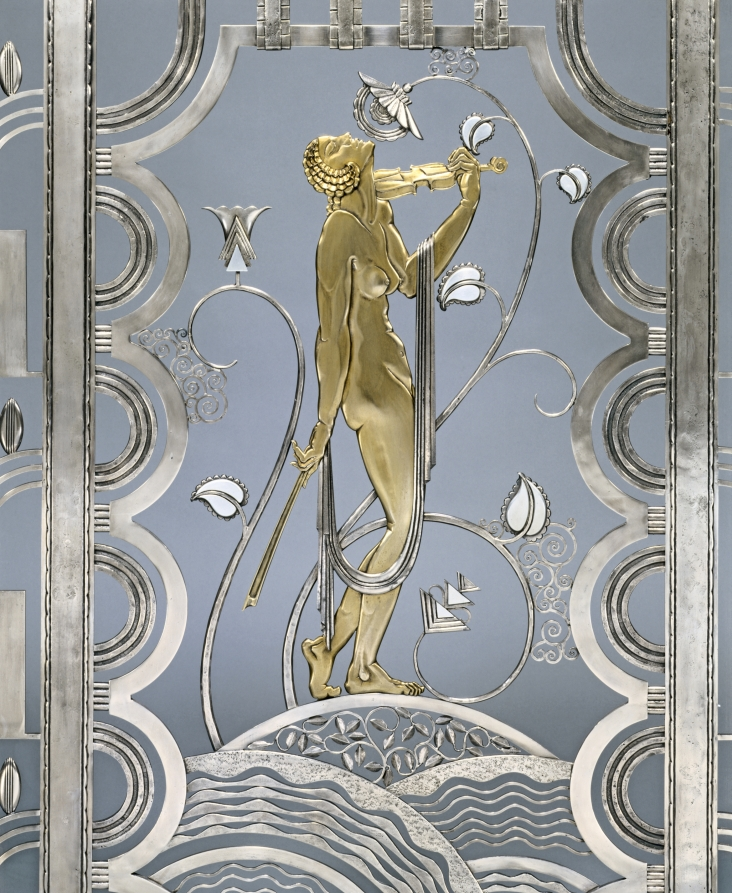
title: Muse with Violin Screen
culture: America, Ohio, Cleveland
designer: Paul Fehér (American, born Hungary, 1898–1990)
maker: Rose Iron Works (America, Ohio, Cleveland, est. 1904)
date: 1930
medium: Steel, brass; silver and gold plating, cotton velveteen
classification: Metalwork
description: Since the early years of the 20th century, the Rose Iron Works, a Cleveland supplier of architectural ornament, has produced distinguished metalwork. The company’s founder, Martin Rose, was born in Austria-Hungary and studied ornamental metalsmithing in Vienna prior to immigrating to Cleveland in 1902. In the 1920s, he hired a talented young Parisian designer, Paul Fehér, to work for the firm. Fehér’s designs, culminating in this massive screen, brought a modern European sensibility to the Rose Iron Works production. With its geometric patterning, highly stylized and abstracted natural forms, and the central figure reminiscent of the celebrated jazz singer Josephine Baker, this screen reflects the classic motifs of Art Deco design.